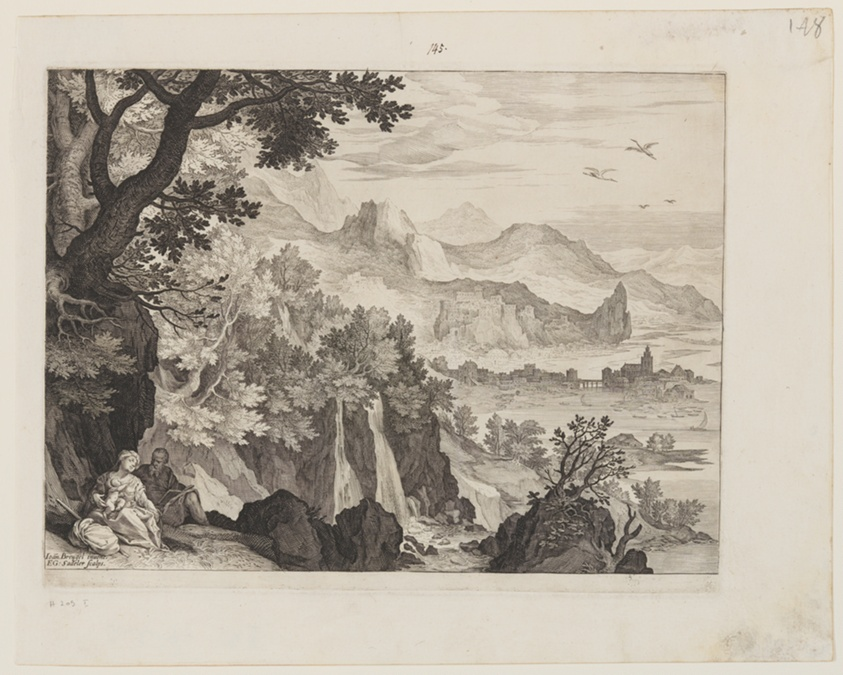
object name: Print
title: Mountainous Landscape with The Rest on the Flight into Egypt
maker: Aegidius Sadeler II (Flemish, c. 1570–1629); after Jan Brueghel the Elder (Flemish, 1568–1625)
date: c. 1590-1620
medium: Engraving on ivory laid paper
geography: Flanders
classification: print; paper; prints and drawing; engraving